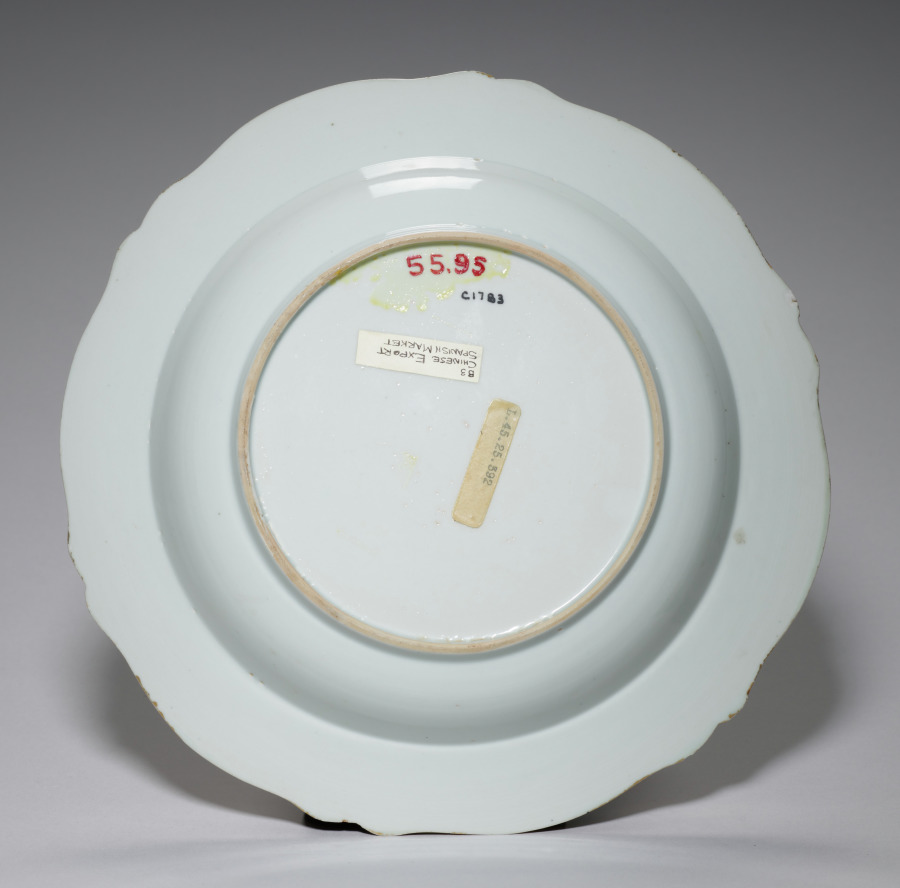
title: Soup Plate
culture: China, Chinese Export, 18th century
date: 1760–70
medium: porcelain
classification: Ceramic